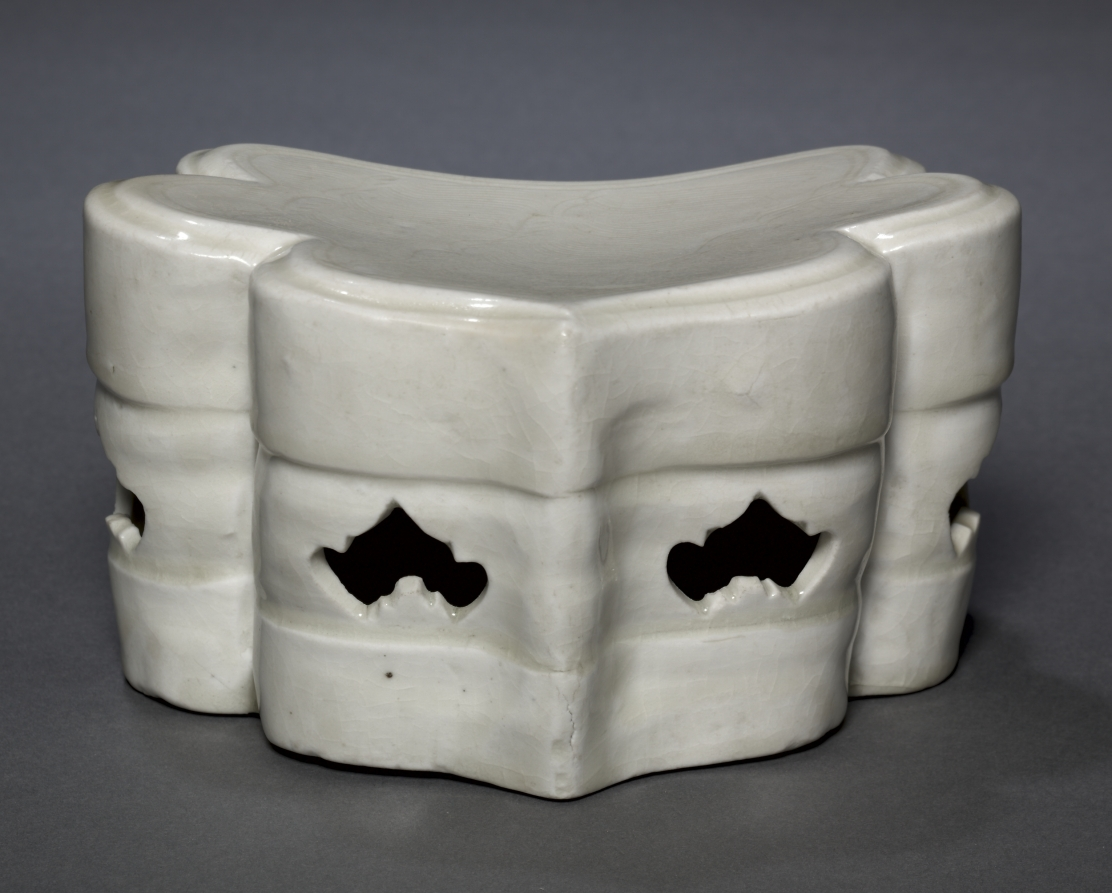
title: Cloud-Collar Pillow with Waves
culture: China, Jiangxi Province, Northern Song dynasty (960–1127)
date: 1000s–1100s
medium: glazed porcelain with incised and carved decoration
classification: Ceramic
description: This ceramic pillow in the form of a cloud—a design pattern variously referred to as ruyi, the shape of a head of an auspicious scepter—is a fine example of qingbai ware from Jiangxi province. It has a pure white body covered with a transparent, glassy glaze that carries a faint greenish tinge, thus giving it another name, yingqing, or "shadow blue." On the surface of the pillow is a carved and incised design of repeating wave patterns. The beauty of this piece lies in its elegance of form, simplicity of design, and delicacy of workmanship.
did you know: While ceramic might not be your choice for a pillow, it actually kept the user cool as they slept.